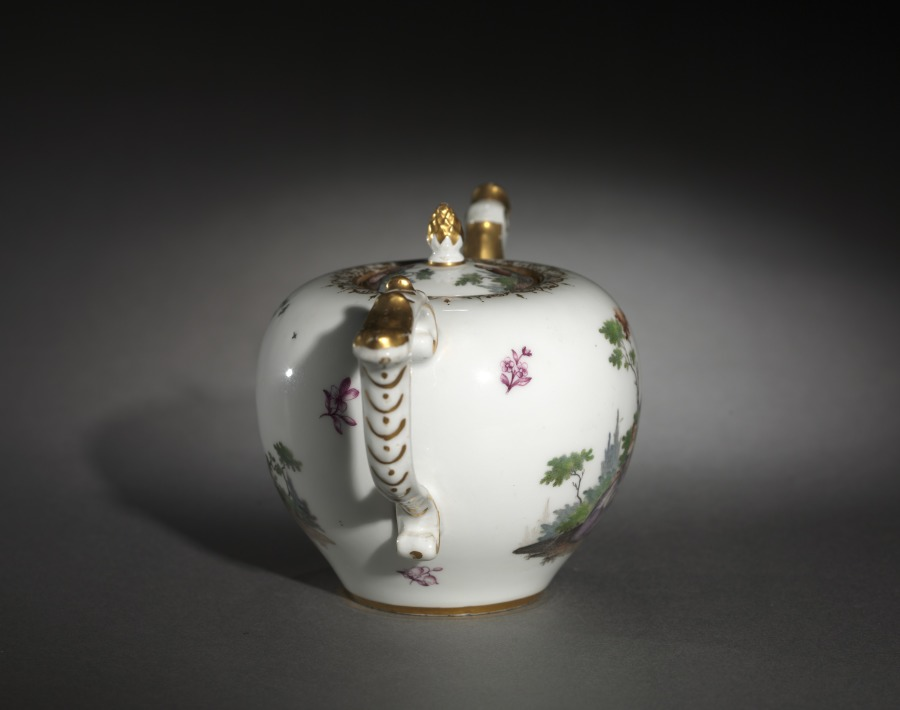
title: Teapot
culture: Germany, Meissen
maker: Meissen Porcelain Factory (German, est. c. 1710)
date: c. 1750–70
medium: porcelain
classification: Ceramic